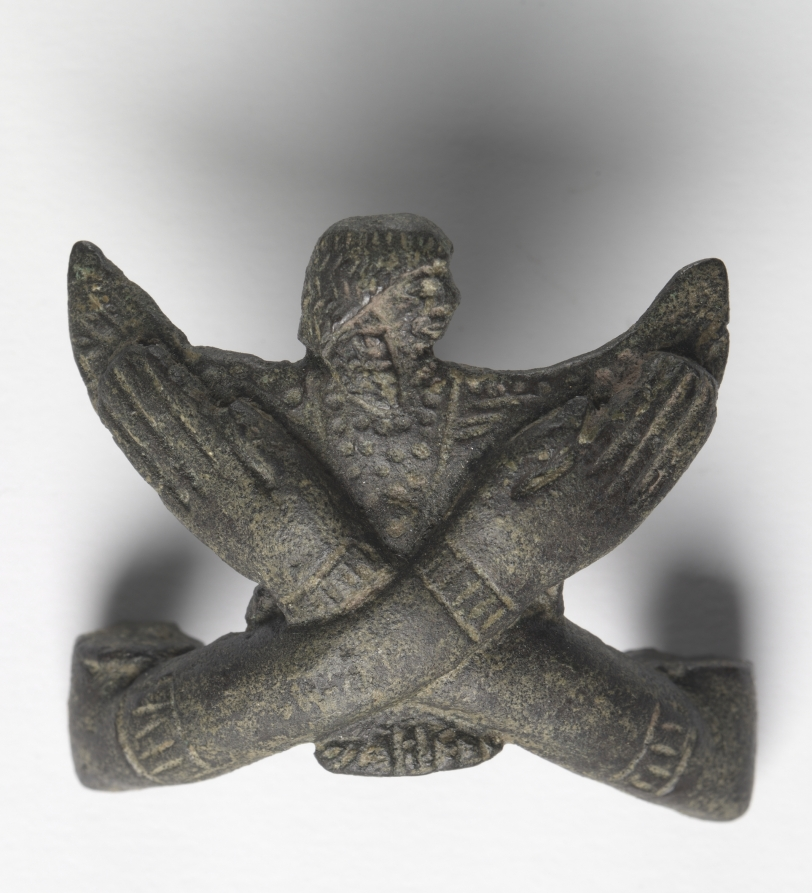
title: Bronze mount from a "Shawabty Bundle": Crossed Arms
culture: Egypt, Thebes, Wadi Qubbanet el-Qirud, New Kingdom (1540–1069 BCE), Dynasties 18–19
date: c. 1336–1256 BCE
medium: bronze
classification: Funerary Equipment